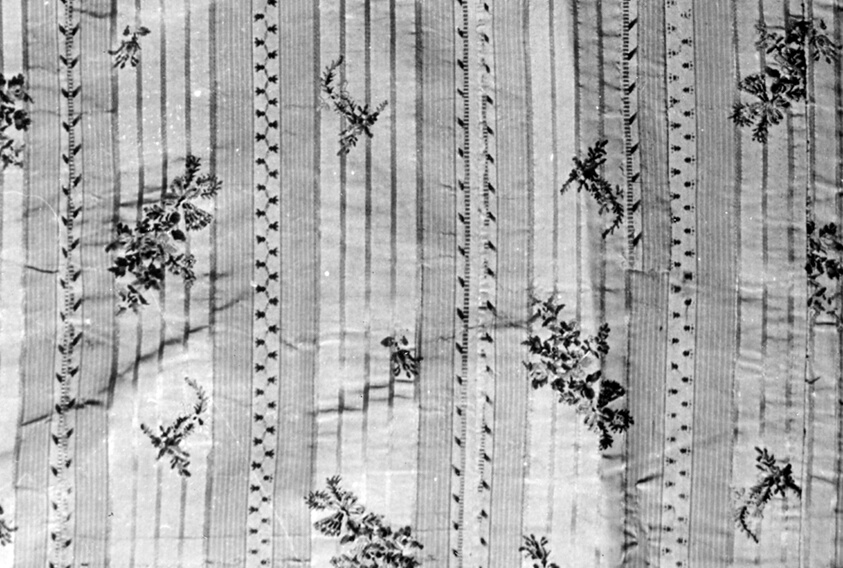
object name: Textile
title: Panel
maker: Probably England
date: c. 1776/79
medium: Silk, stripes of plain weave with supplementary patterning warps; plain weave with supplementary brocading wefts; and warp-float faced 7:1 satin weave with supplementary brocading wefts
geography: England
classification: textile; weaving